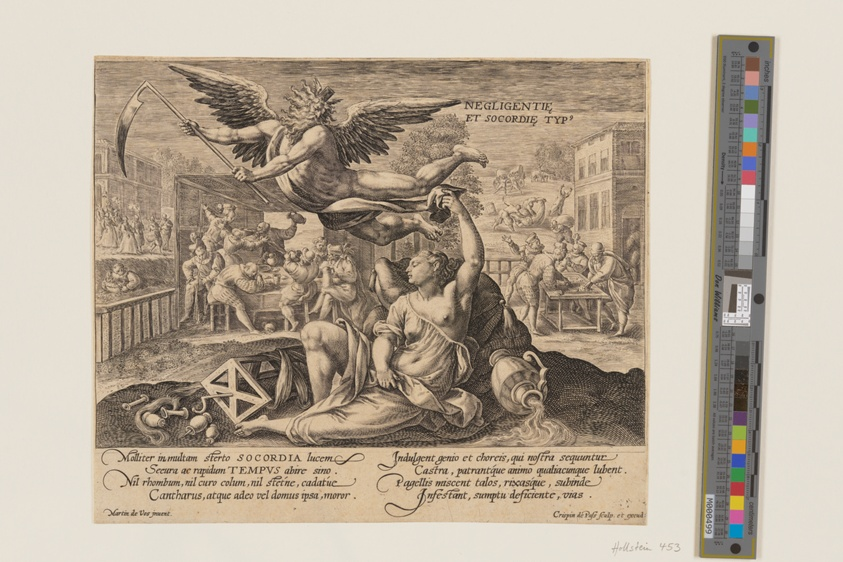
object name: Print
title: Negligentie et Socordie Typus, from Time with Virtues and Vices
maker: Crispijn van de Passe I (Dutch, c. 1565–1637); after Maarten de Vos (Flemish, 1532–1603)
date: c. 1600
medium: Engraving on ivory laid paper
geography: Netherlands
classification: engraving; paper; print; prints and drawing